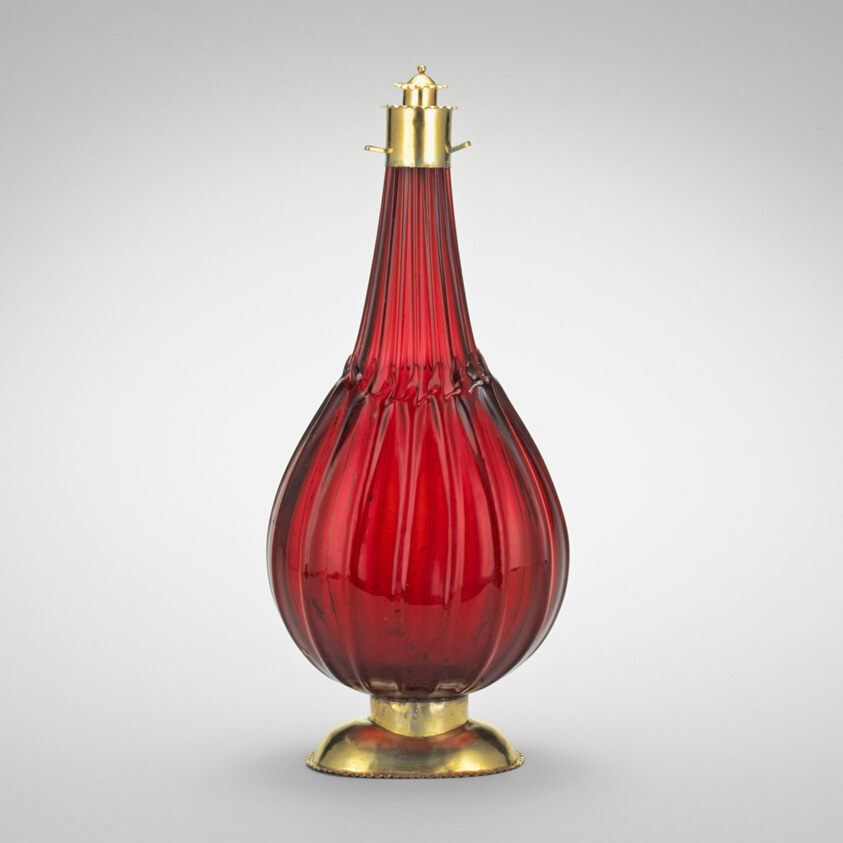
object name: Glass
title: Pilgrim Bottle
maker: Potsdam, Germany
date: 1700/10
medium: Ruby glass with silver-gilt mounts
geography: Potsdam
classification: glass; european decorative arts